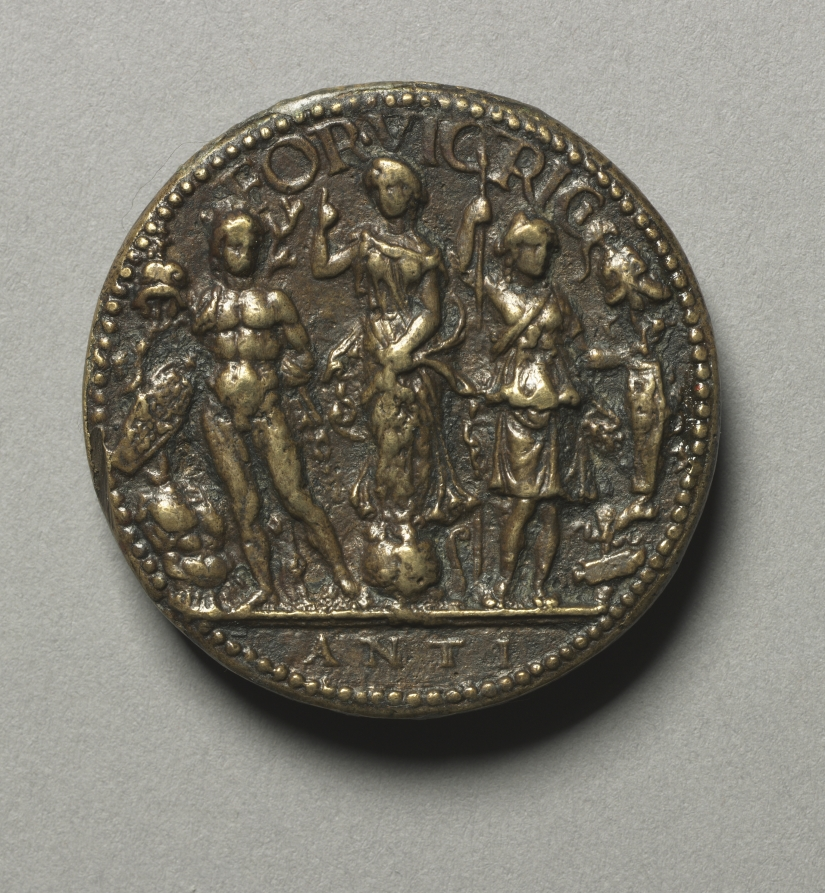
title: Portrait of Gianfrancesco Gonzaga di Ròdigo, 1443-1496, Lord of Sabbionetta (reverse)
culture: Italy, 15th century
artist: Antico (Italian, c. 1460–1528)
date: 1479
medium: bronze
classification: Sculpture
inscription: reverse: above: FORVICTRICI; in exergue: ANTI.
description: The art of the medal was introduced into Italy by Pisanello, His work as a medalist began with the portrait medal of this emperor, who, in 1438, visited the Council of Ferrara.